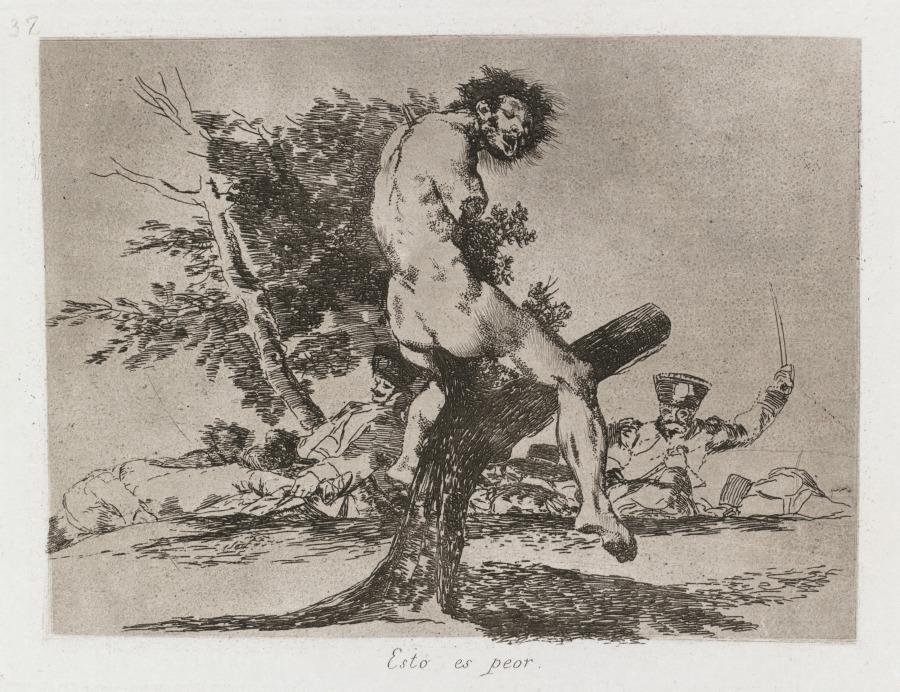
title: Disasters of War: Pl. 37, This is worse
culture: Spain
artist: Francisco de Goya (Spanish, 1746–1828)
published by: Real Academia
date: 1810–1813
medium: Etching and aquatint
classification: Print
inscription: In plate, below image, center: Esto es peor.; in plate, above image, upper left: 37; above upper right platemark: 37. erased graphite